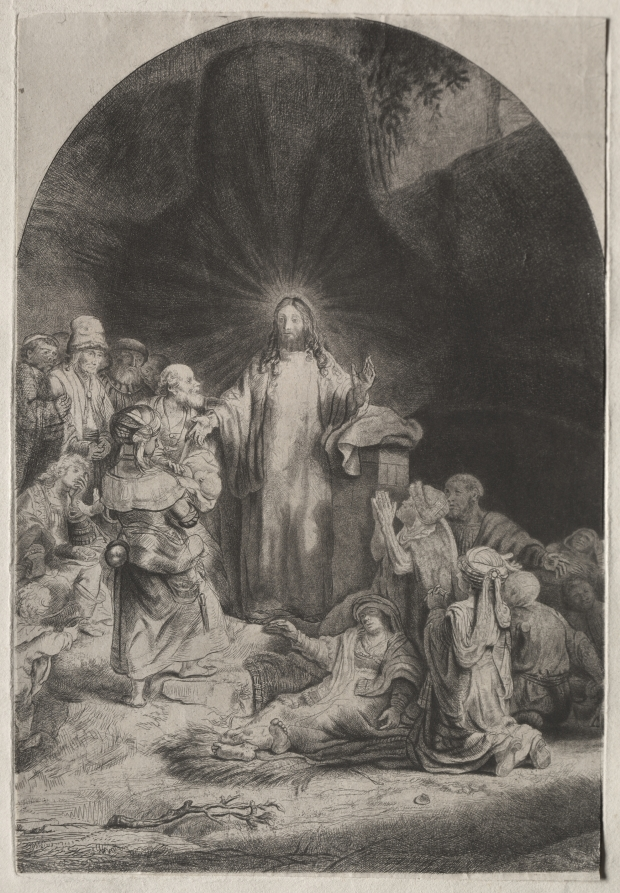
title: The Hundred Guilder Print, central section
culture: Netherlands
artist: Rembrandt van Rijn (Dutch, 1606–1669)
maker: William Baillie (Irish, 1723-1810)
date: c. 1649, printed later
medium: etching, drypoint, and engraving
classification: Print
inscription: SECONDARY SUPPORT, lower left, in graphite: Rembrandt[underlined] ; below image, in graphite: Middle part of the Hundred Guilder print ; lower left, in graphite: H. 236 ; across bottom, in graphite: central portion of plate reworked by Baillie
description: Rembrandt's original plate for the Hundred Guilder print (1942.757) was acquired by William Baillie in 1775 and reworked. The plate was later cut, shaped, and printed in separate sections, as here, showing the central section of the composition.